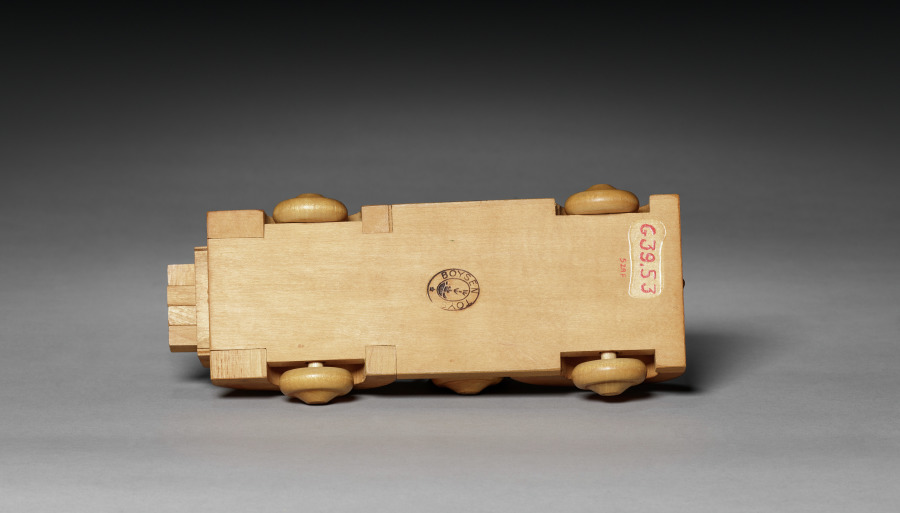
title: Boysen Toys (truck)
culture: Denmark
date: 1900s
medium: Wood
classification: Wood